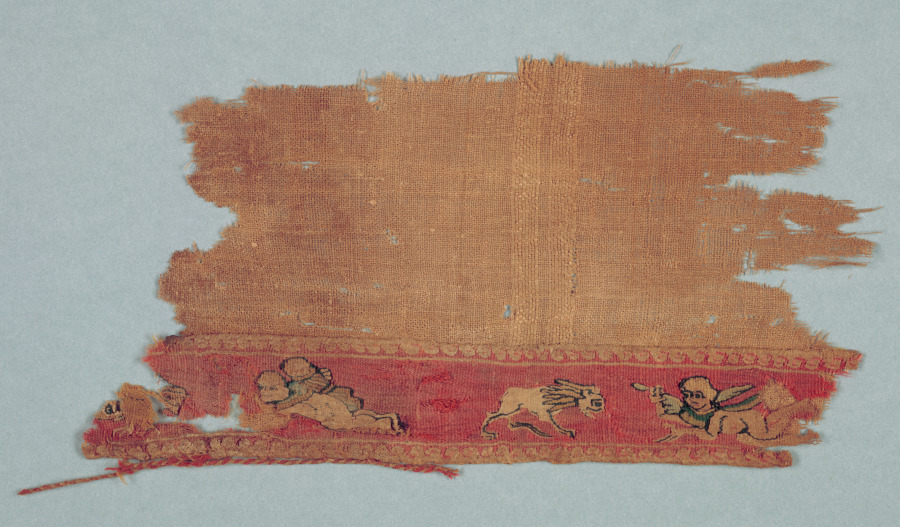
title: Fragment from a Child's Tunic: Sleeveband I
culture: Egypt, Umayyad period (661–750)?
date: 600s–700s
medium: Wool and linen: tabby weave, inwoven tapestry ornament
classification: Textile